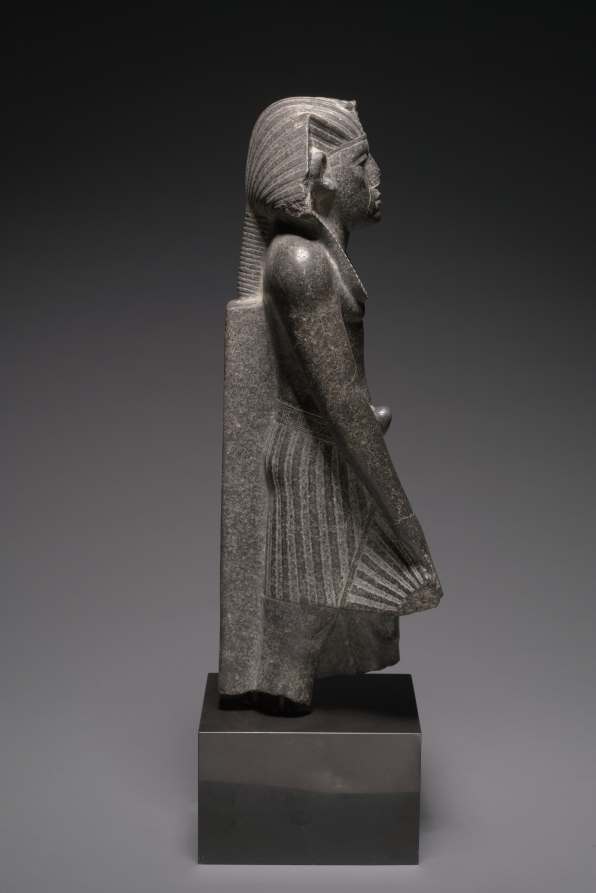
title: Statue of Amenemhat III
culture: Egypt, Middle Kingdom (2040–1648 BCE), Dynasty 12, reign of Amenemhat III (1860–1814 BCE)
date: c. 1859–1814 BCE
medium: granodiorite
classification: Sculpture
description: Even though this statue of a king is uninscribed, its distinctive features identify it without any doubt as a portrait of Amenemhat III. The heavy brows, prominent cheekbones, hollow cheeks, jutting lower jaw, and tightly bunched muscles at the corners of the mouth make a strikingly realistic impression. Not realistic, however, are the king’s supersized ears. Instead, they symbolize the ruler’s willingness to hear the prayers of his people. If this image had been carved in relief, the king’s hands would have been uplifted in worship. Here, however, to prevent the breakage of projecting limbs, the ruler’s hands are pressed flat against the front his kilt, a portion of which is looped over his belt.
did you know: The first pyramid Amenemhat III attempted to build, the so-called Black Pyramid, had major construction flaws and had to be abandoned when it started to collapse.